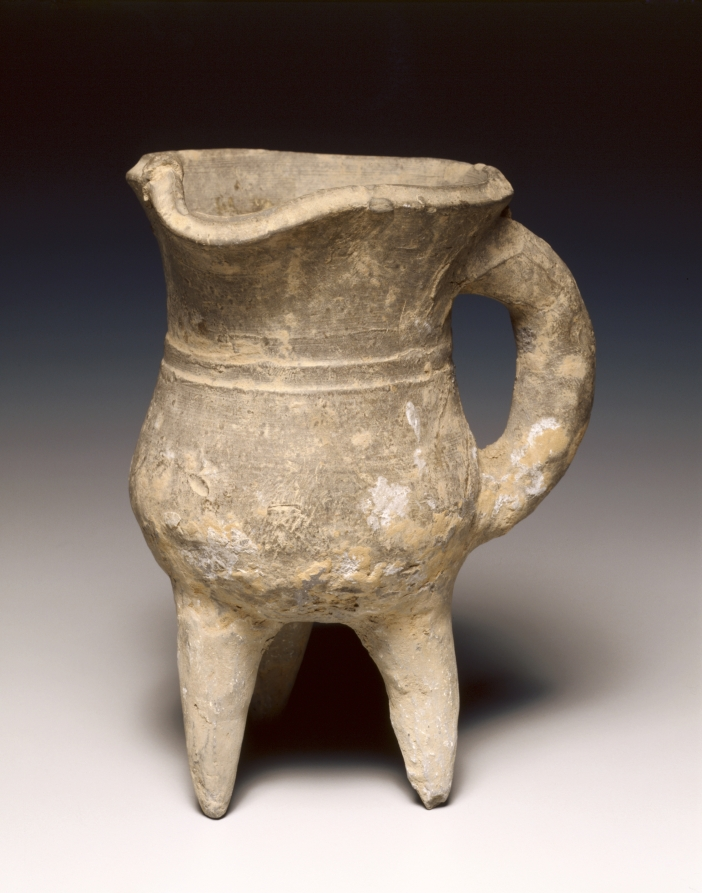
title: Wine Warmer (Jue)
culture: China, Shang dynasty (c. 1600–c. 1046 BCE), Anyang phase (c. 1250–1046 BCE)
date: c. 1300–1023 BCE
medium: pottery, tripod vessel with loop handle and rudimentary bowstring decoration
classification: Ceramic